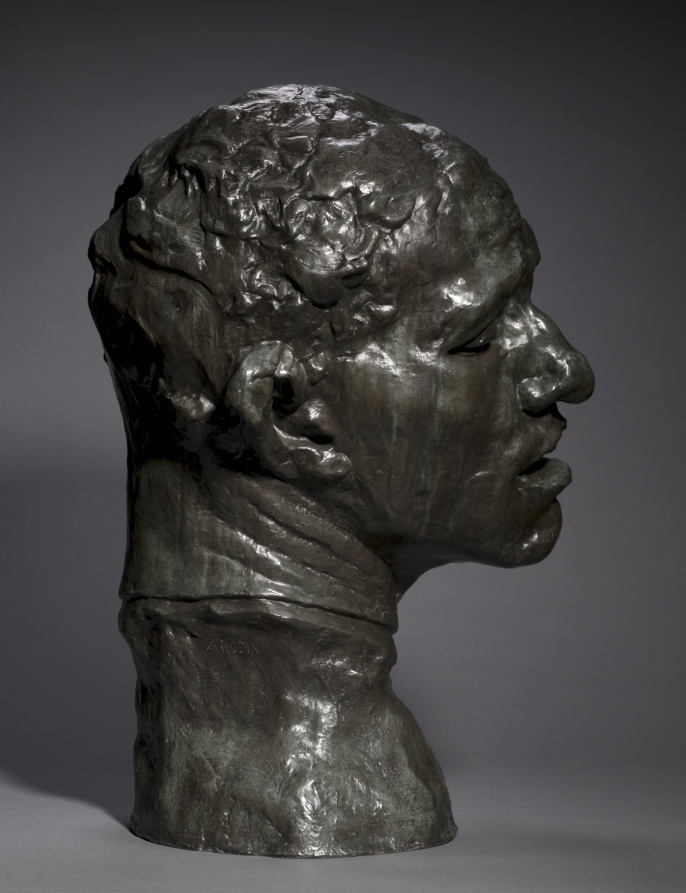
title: Heroic Head of Pierre de Wissant, One of the Burghers of Calais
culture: France, 19th century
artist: Auguste Rodin (French, 1840–1917)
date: 1886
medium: bronze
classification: Sculpture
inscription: inscribed at neck, left: A.Rodin; inscribed lower back: Alexis Rudier/Fondeur-Paris.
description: This sculpture depicts one of the figures in Rodin’s large public monument The Burghers of Calais (1884–89), featuring six French men who volunteered to be taken prisoner by the English in exchange for lifting the siege of Calais during the Hundred Years War (1337–1453). Pierre de Wissant’s anguished expression suggests extreme mental suffering as he contemplates his expected execution. Rodin exhibited a life-size version of the figure as an independent work before completing the monument. He later made multiple versions in various sizes and media.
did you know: This sculpture depicts the head of a figure from Rodin's large public monument The Burghers of Calais (1884-89). The CMA also owns a plaster version of the head.